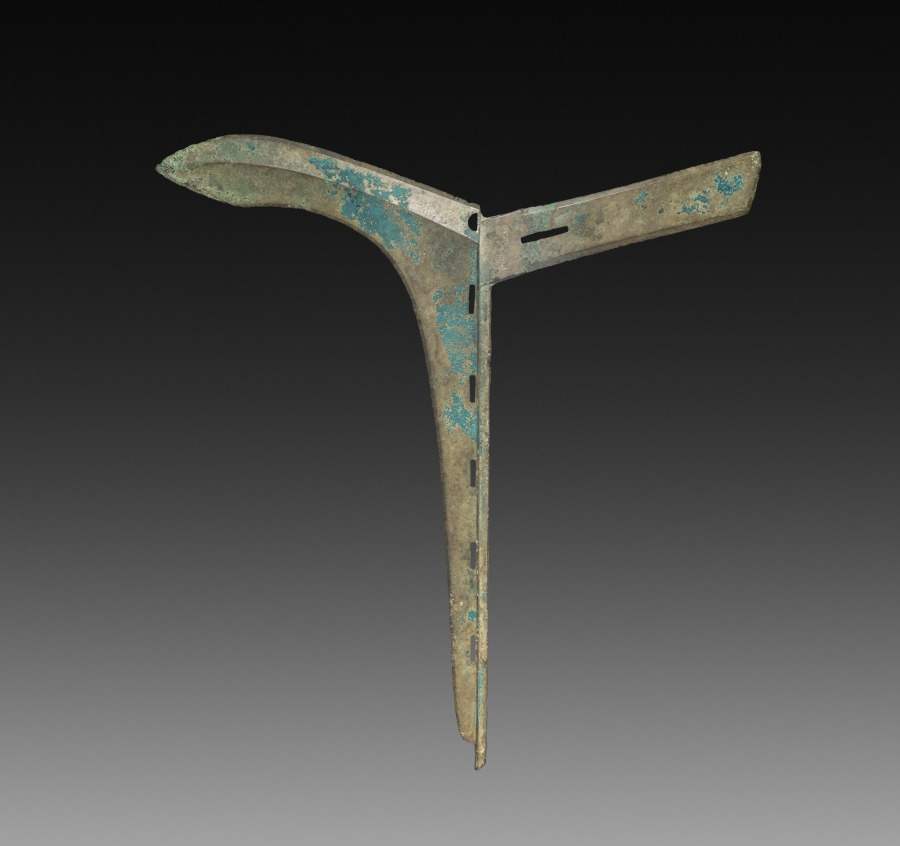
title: K'o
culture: China, Zhou dynasty (c. 1046–256 BCE)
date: 1045–256 BCE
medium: bronze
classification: Arms and Armor